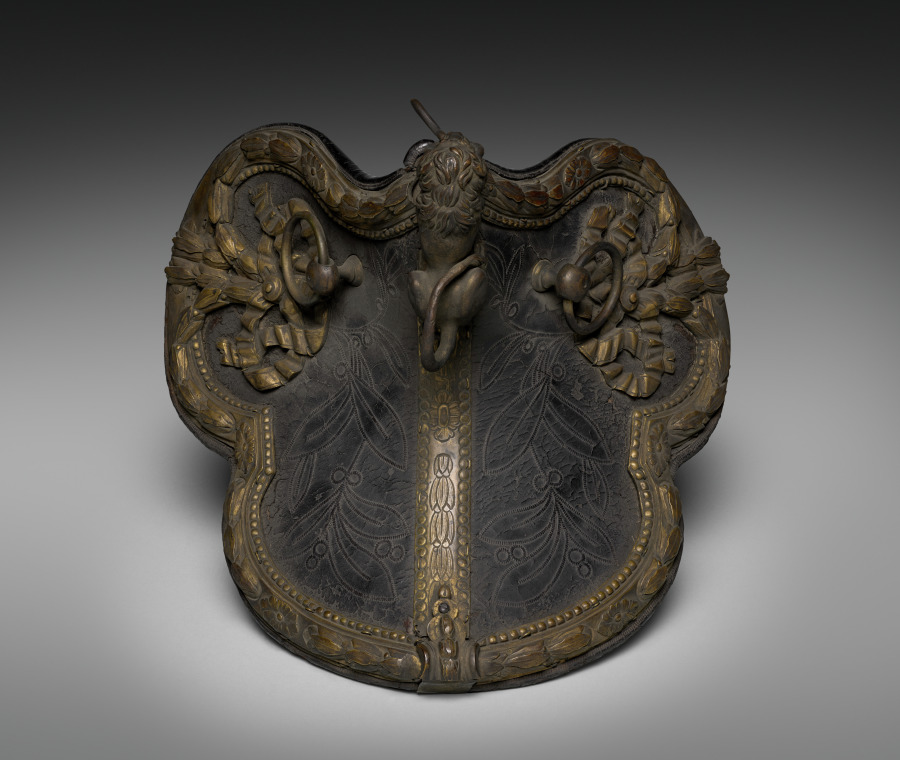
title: Child's Harness Saddle with Lion Pommel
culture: France, 17th century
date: 1600s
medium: leather, tooled with wood, canvas and steel on a brass frame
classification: Arms and Armor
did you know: This child-sized harness saddle was said to have been used in a riding school.